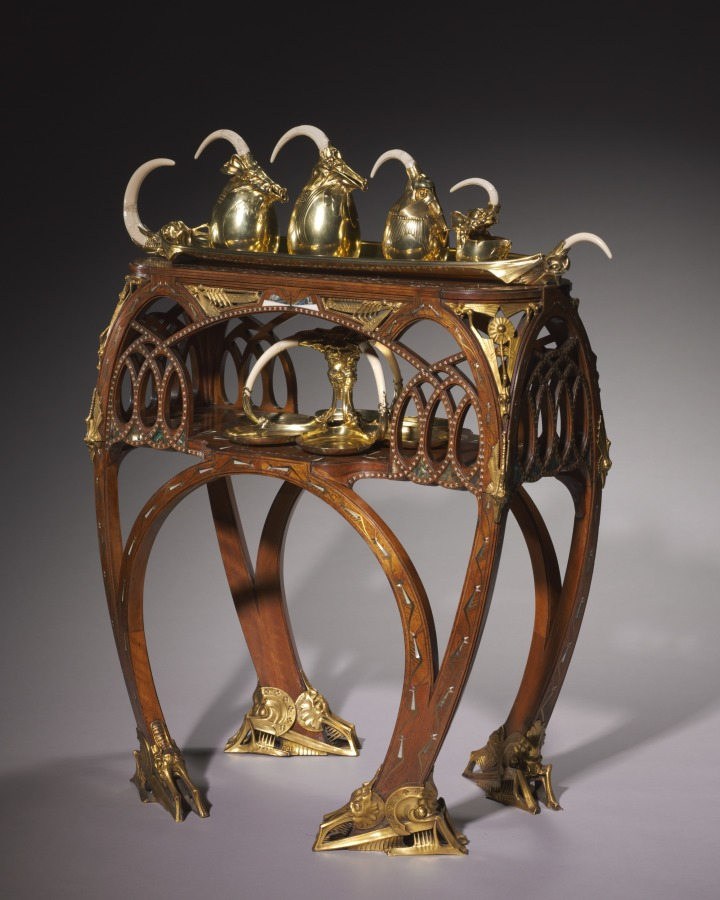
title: Tea Table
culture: France, Paris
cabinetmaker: Carlo Bugatti (Italian, 1856–1940)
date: c. 1907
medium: inlaid wood (mahogany?), cast and gilded bronze mounts, inlays of ivory or bone, metal, and mother-of-pearl (marine mussels or pearl oysters)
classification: Furniture and woodwork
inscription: signed in ligature in white metal inlay on central shelf: Bugatti.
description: Luxurious materials might catch the eye first, but a closer look reveals the imaginary creatures that adorn the surface of this table. Featuring elaborate arches, a favorite motif that appeared throughout Bugatti's furniture, this fantastical imagery is a window into the designer's expressive imagination.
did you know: Carlo Bugatti's sons achieved illustrious careers of their own. Rembrandt Bugatti (1884-1916) became a celebrated sculptor, and Ettore Bugatti (1881-1947) manufactured luxurious automobiles and racing cars.